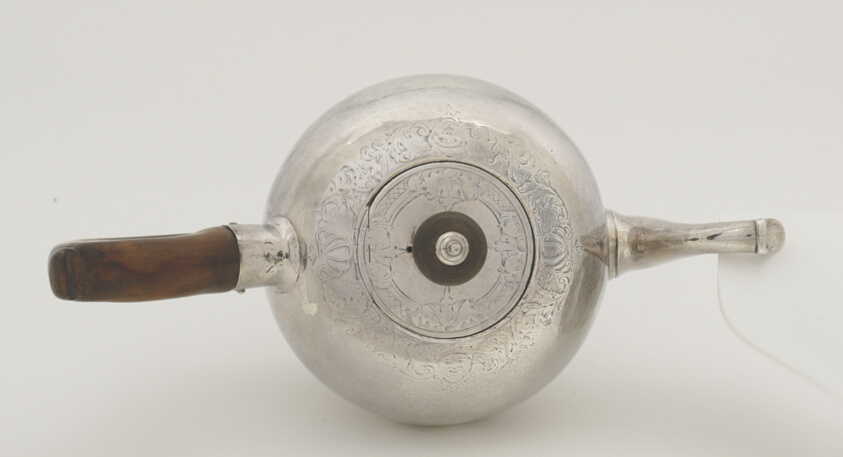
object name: Metalwork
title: Teapot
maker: Jacob Hurd; American, 1702/03–1758; Boston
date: 1740–55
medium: Silver and walnut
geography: Boston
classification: teapot; silver; american decorative arts; american arts; decorative arts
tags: dining, drinking